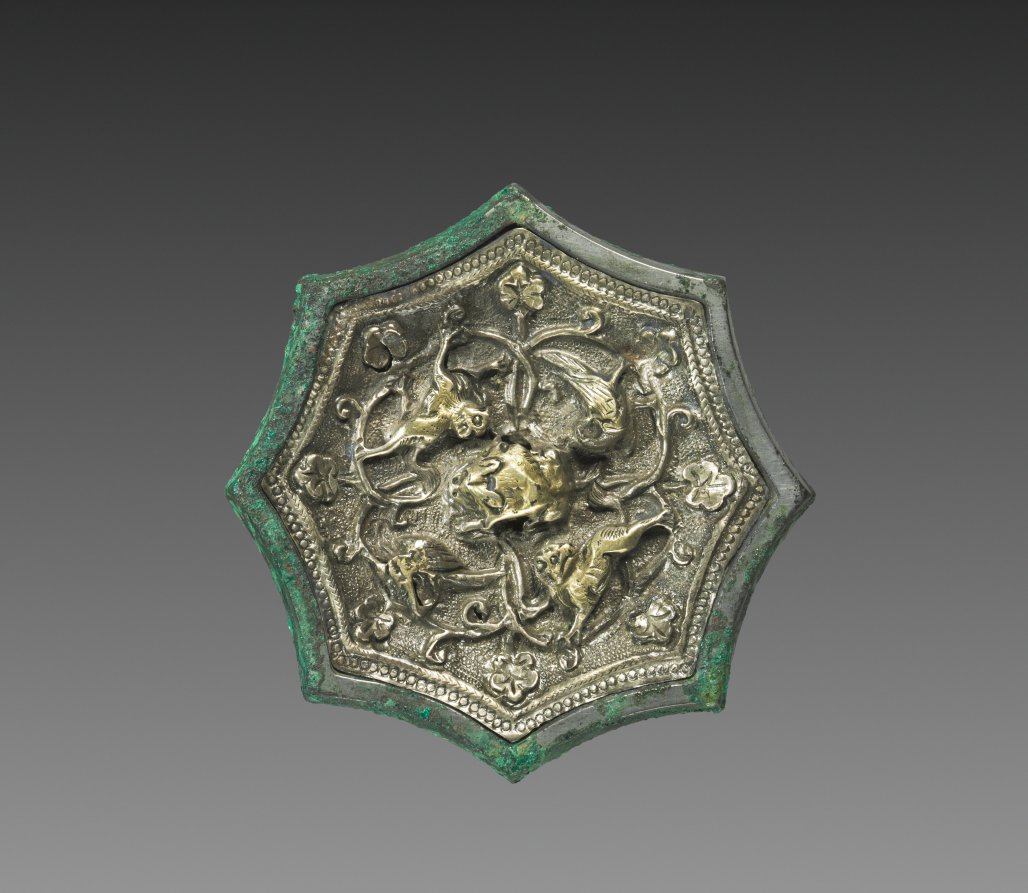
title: Mirror with Animals and Birds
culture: China, Tang dynasty (618-907)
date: early 700s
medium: bronze inset with gilded-silver relief decoration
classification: Metalwork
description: The silver inset of this mirror back was decorated with several hand-beaten techniques. High-relief birds, beasts, and foliage were hammered from the underside (repoussé) and finely chiseled on the front (chased). The background and border were punched with a metal stamp of tiny circles. Mirrors of this precious material, diminutive size, and starlike form number among the most refined products of Tang metalworkers. Some historians suggest that miniature mirrors were specifically designed as burial gifts for children, but Tang gold and silver cosmetic boxes of similar scale indicate that these objects were made to grace the dressing tables of elegant women.